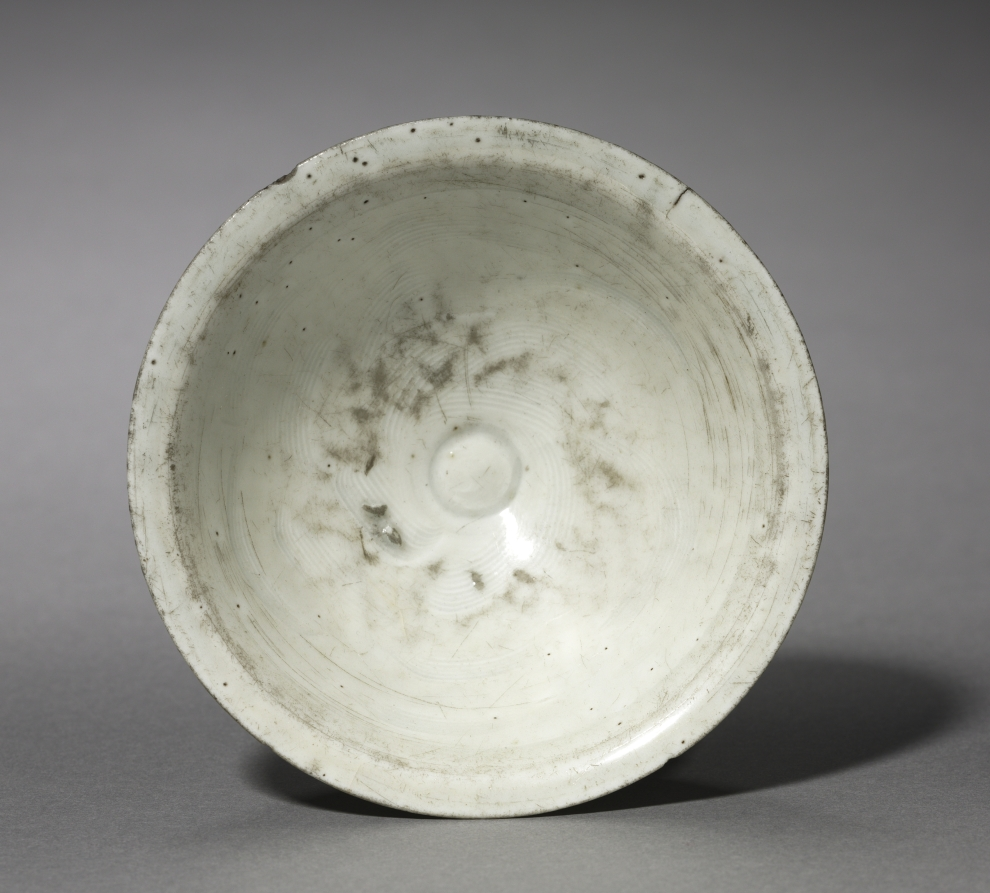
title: Bowl with Carved Design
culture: Korea, Goryeo dynasty (918–1392)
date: 1000s–1100s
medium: pottery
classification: Ceramic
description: As early as the seventh century, the practice of drinking tea and wine became an important part of elite leisure culture in Korea. A wide bowl like this example was especially suitable for drinking powdered tea shaved from a compressed tea cake, the most commonly enjoyed type during the Goryeo period.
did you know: This white bowl is highly likely to have served as a tea bowl.